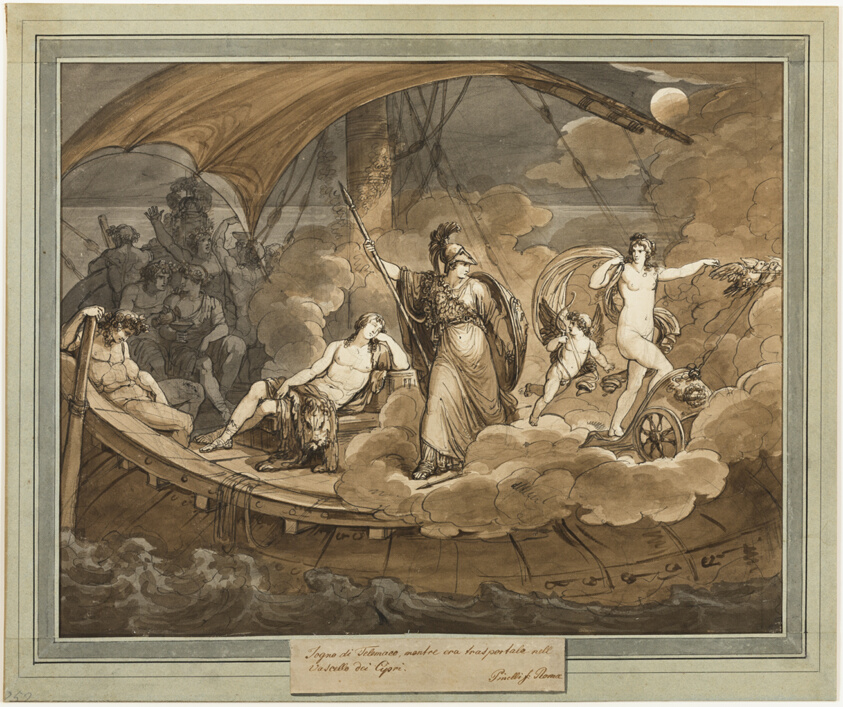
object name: Drawing and Watercolor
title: The Dream of Telemachus, from The Adventures of Telemachus, Book 4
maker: Bartolomeo Pinelli (Italian, 1781-1835)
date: 1808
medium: Pen and black ink, with brush and gray and brown wash, over black chalk on ivory laid paper, laid down on board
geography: Italy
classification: drawings (visual works); prints and drawing